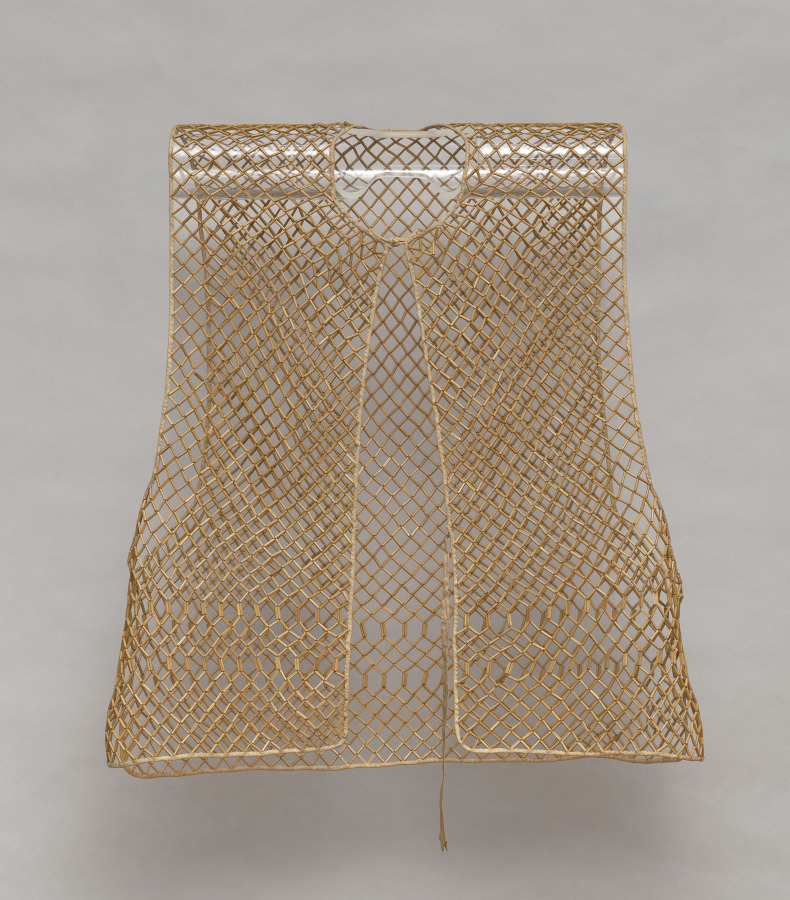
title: Sleeveless garment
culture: China, Qing dynasty (1644-1911)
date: 1800s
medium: Bamboo beads strung together in diamond and hexagon patterns; edges in plain weave cotton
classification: Garment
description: This loose-fitting bamboo vest is a summer undershirt, made of an estimated 3,490 fine bamboo tubes. The overall structure of the vest is held together with cotton thread. Such vests were worn under an outer garment to allow the air to circulate and protect the outer garment from soilage, especially in the hot and humid climate of southern China. Textual evidence indicates that officials during the 1500s in Jiangnan wore bamboo vests from Jiangsu province, one of the production centers.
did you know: According to Nhat Quyen Nguyen, CMA graduate intern in textile conservation, this garment is made of at least 3,490 cut bamboo pieces.